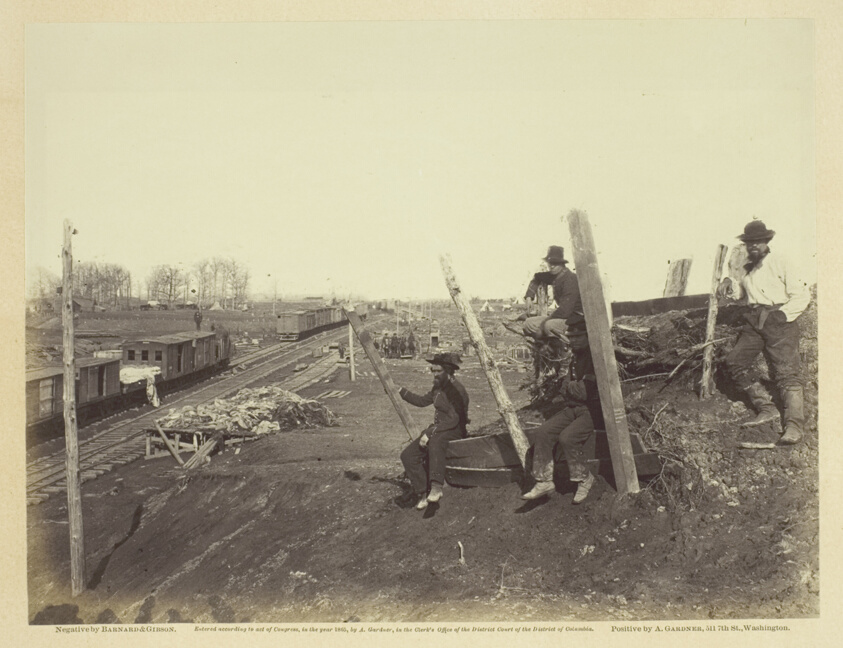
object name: Photograph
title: Manassas Junction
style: 19th century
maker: Barnard and Gibson (American, active 19th century)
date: March 1862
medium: Albumen print, pl. 10 from the album "Gardner's Photographic Sketch Book of the War, vol. 1" (1866)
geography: United States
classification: photograph; albumen silver print; photography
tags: Collected by Hugh Edwards, Gardner's Photographic Sketch Book